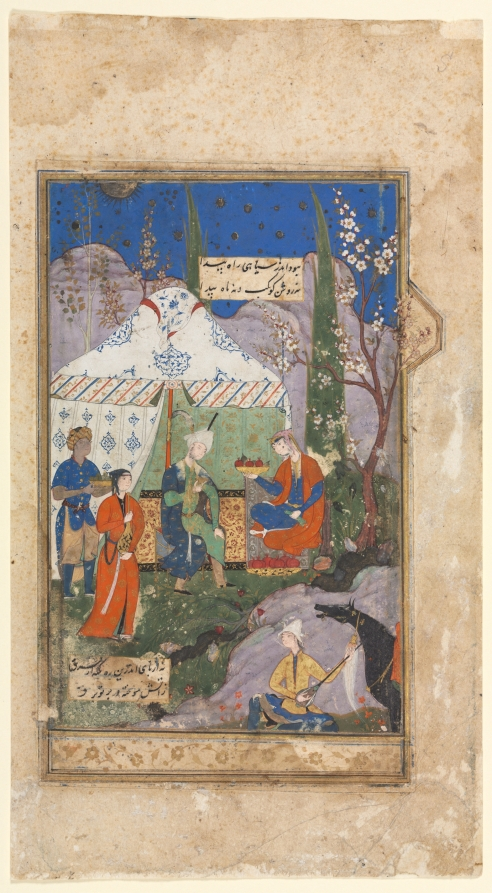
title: An Episode from the Story of the Sasanian King Khusrau and His Beloved Shirin, from a Khamsa (Quintet) of Nizami (1141–1209) (verso)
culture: Iran, probably Shiraz, Safavid period (1501-1722)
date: 1540–70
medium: opaque watercolor, ink, gold, and silver on paper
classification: Manuscript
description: The Khamsa is a collection of five narrative poems, one of which is dedicated to the romance of Khusrau Parviz (590–628), a Sasanian king of Iran, and Shirin, his beloved Armenian princess. The lovers are seated in a nocturnal landscape, indicated by the dark blue sky dotted with stars, painted with now tarnished silver. Shirin serves figs and pomegranates, symbolic of fertility, to Khusrau as attendants bring more figs and wine. Next to Shirin’s black horse, the musician at bottom right plays a tanbur, a long-necked, fretted lute.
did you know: Khusrau’s turban has the anachronistic baton worn by Safavid royalty and the egret feather, an emblem of nobility instituted by the Mongols in the 1200s.